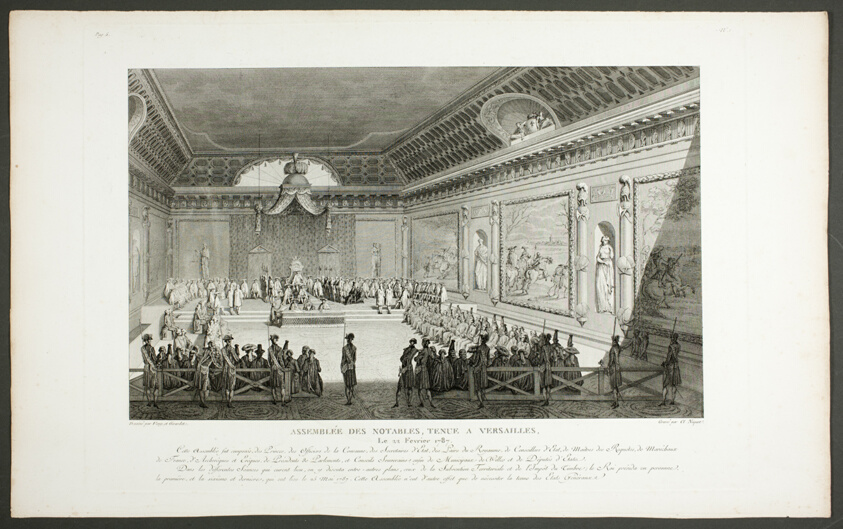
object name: Print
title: Assembly of Notable People, Held at Versailles, from the series Tableaux historiques de la Révolution française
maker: Claude Niquet (French, c. 1770-1831); after Abraham Girardet (French, 1764-1823); after Veny (probably French, 18th century)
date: 1798-1804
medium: Etching with engraving on ivory wove paper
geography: France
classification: etching; print; prints and drawing